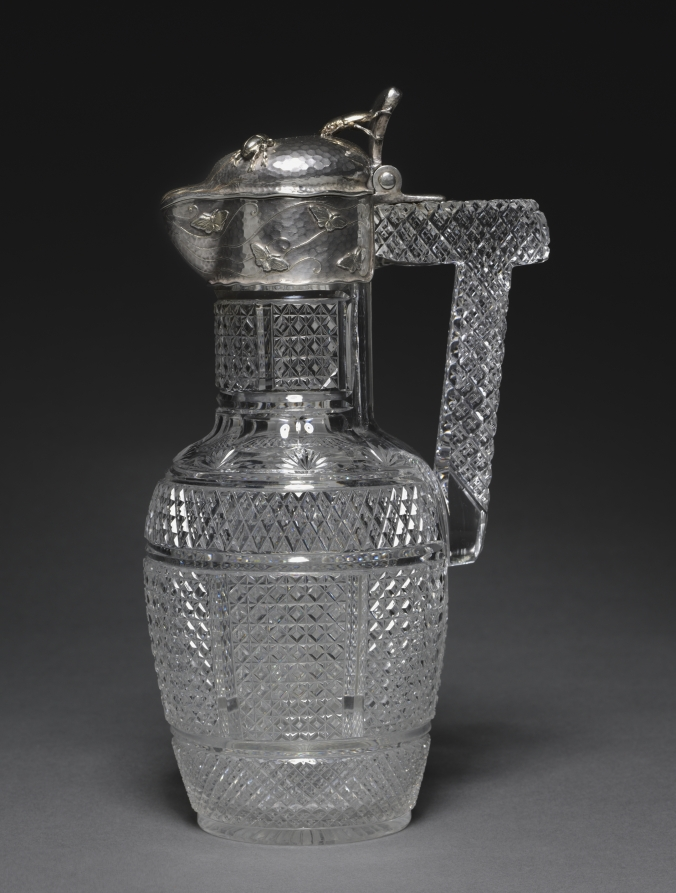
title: Claret Jug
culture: America, New York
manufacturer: Tiffany & Co. (America, New York, est. 1837)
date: c. 1880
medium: rich cut-glass and silver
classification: Miscellaneous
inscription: inscribed on flange: TIFFANY & CO M453 STERLING SILVER.